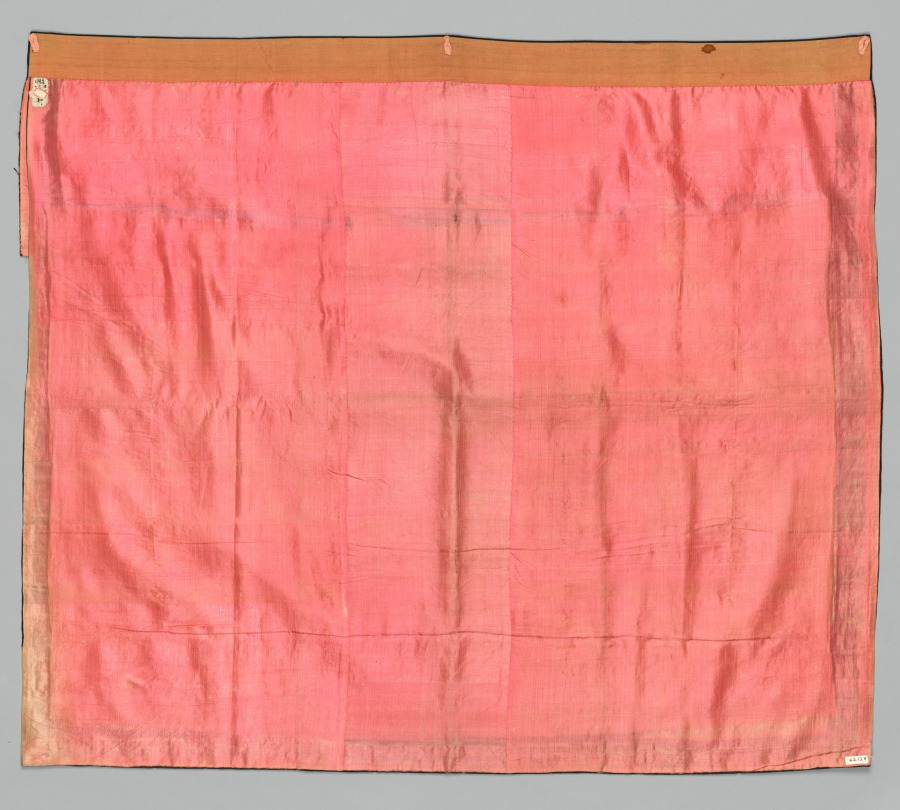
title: Table Hanging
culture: China, Qing dynasty (1644-1911)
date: 1700s–1800s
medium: Silk and gold filé; tapestry weave, slit joins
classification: Textile